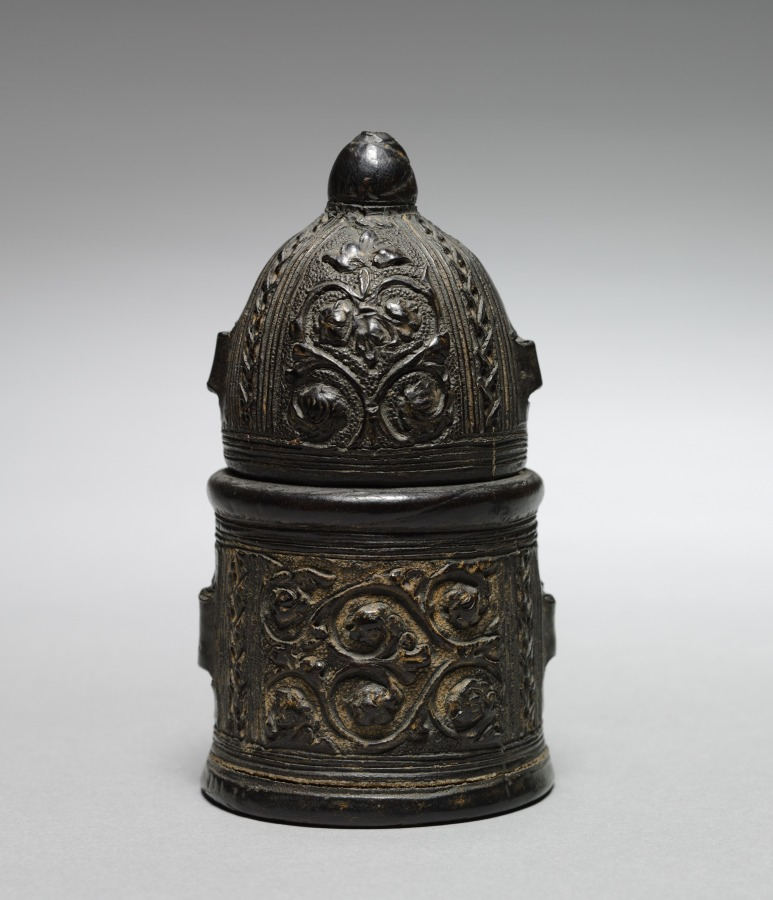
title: Ink Pot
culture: Northern Italy, 15th century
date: c. 1425–1450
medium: leather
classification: Leather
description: Intended for use on the writing table, this ink pot was used with a dip pen or quill. It may have belonged to a professional scribe or scholar, or perhaps to a wealthy layperson. The leather is embellished by tooling, embossing (pressing), and punching.